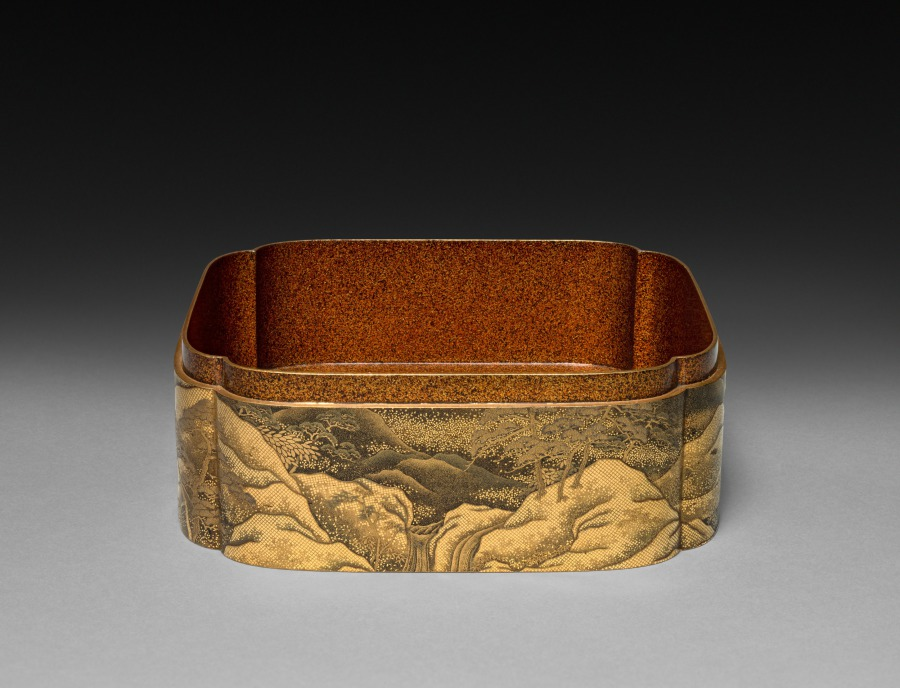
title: Box (middle)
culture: Japan, Meiji period (1868–1912)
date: late 1800s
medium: wood with lacquer and gold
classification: Lacquer